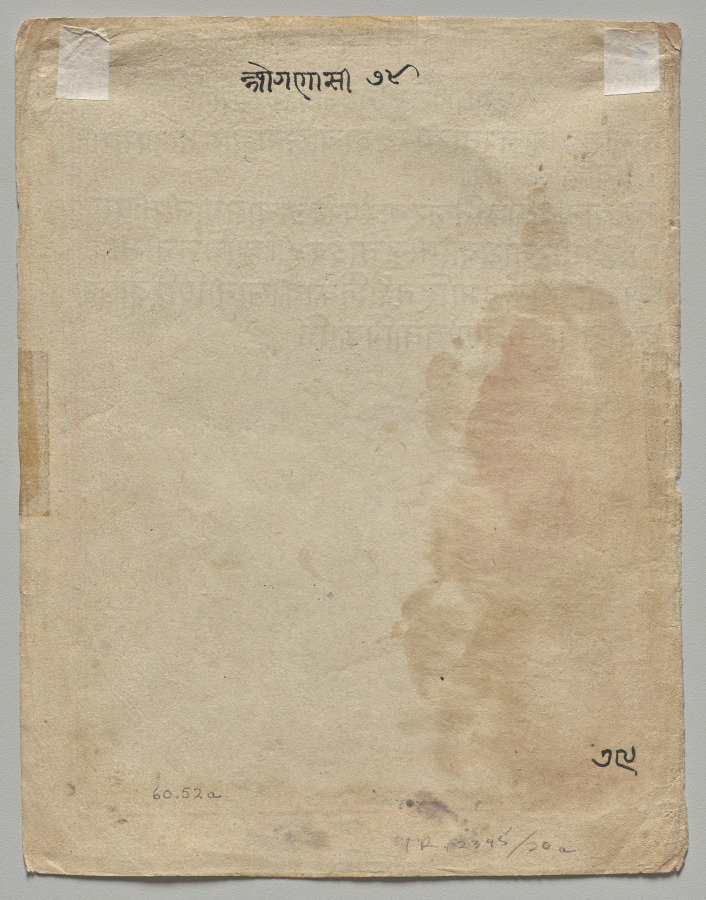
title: A Young, Angry Heroine, Folio 28 from a Rasamanjari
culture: Northwestern India, Rajasthan, Rajput Kingdom of Mewar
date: c. 1615–20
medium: Gum tempera, ink, and gold on paper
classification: Painting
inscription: Recto, upper center: You are expert in flirtation; you are charming; you are my lord and wonderful in your youthful handsomeness.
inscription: Recto, center: Madya Dhira Adhira.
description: The scene of a conversation between two lovers is set within a bedchamber, golden curtains pulled up. The heroine sits on the bed, with three long-necked wine vessels on the wall behind her. A brass ewer for washing with water is on the floor behind the bed.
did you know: Men applied fragrant black pastes to their underarms.